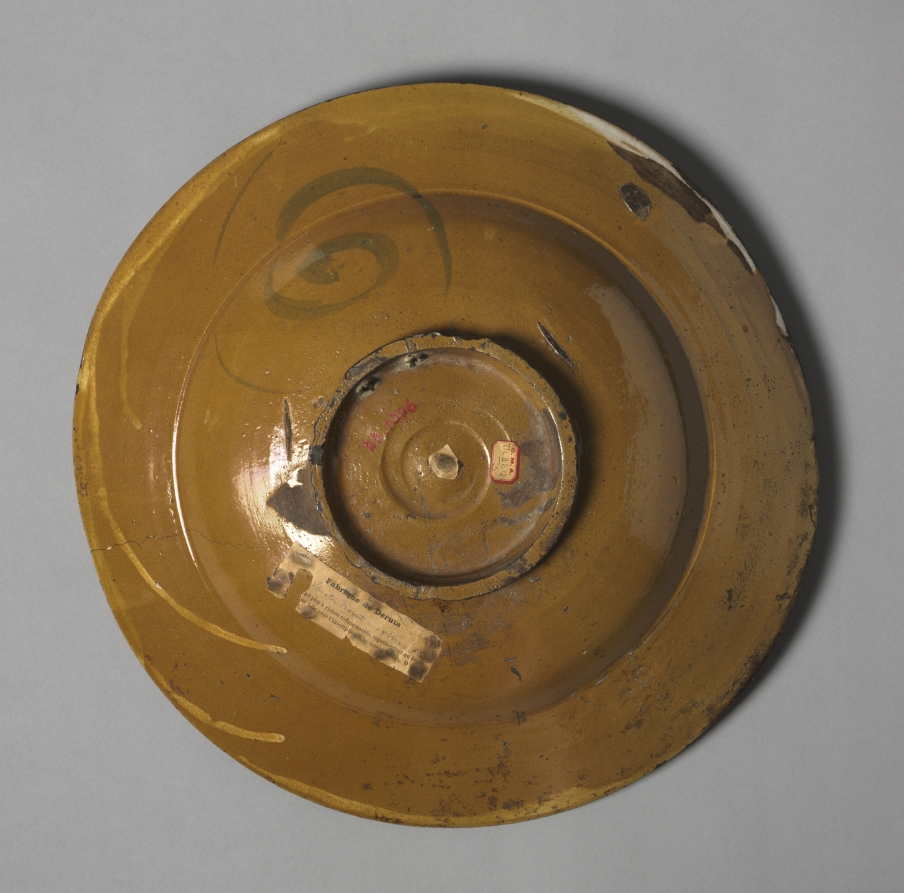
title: Bella Donna Charger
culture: Italy, Papal States, Deruta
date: c. 1520–30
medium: tin-glazed earthenware with yellow and blue lustre (maiolica)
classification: Ceramic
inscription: with inscription: IV BLLIA BELLA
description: Ceremonial plates decorated with a bella donna (beautiful woman) feature half-length portraits of a young woman surrounded by scrolled banners. Many bella donna plates were informed by the frescos of Renaissance painters Pietro Perugino and Pinturicchio.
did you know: Scholars believe that chargers such as these were given as marriage gifts or in memory of someone who had died.